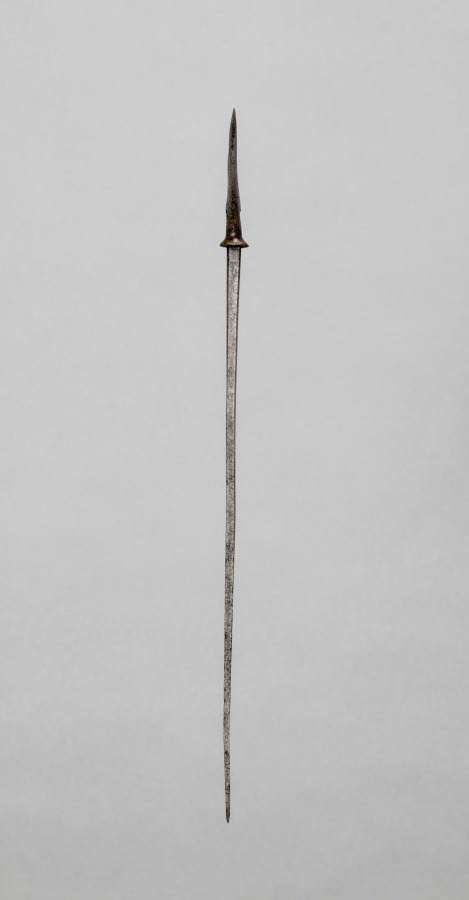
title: Arrow Head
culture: Japan, Edo period (1615–1868)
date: 1700s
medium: iron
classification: Arms and Armor